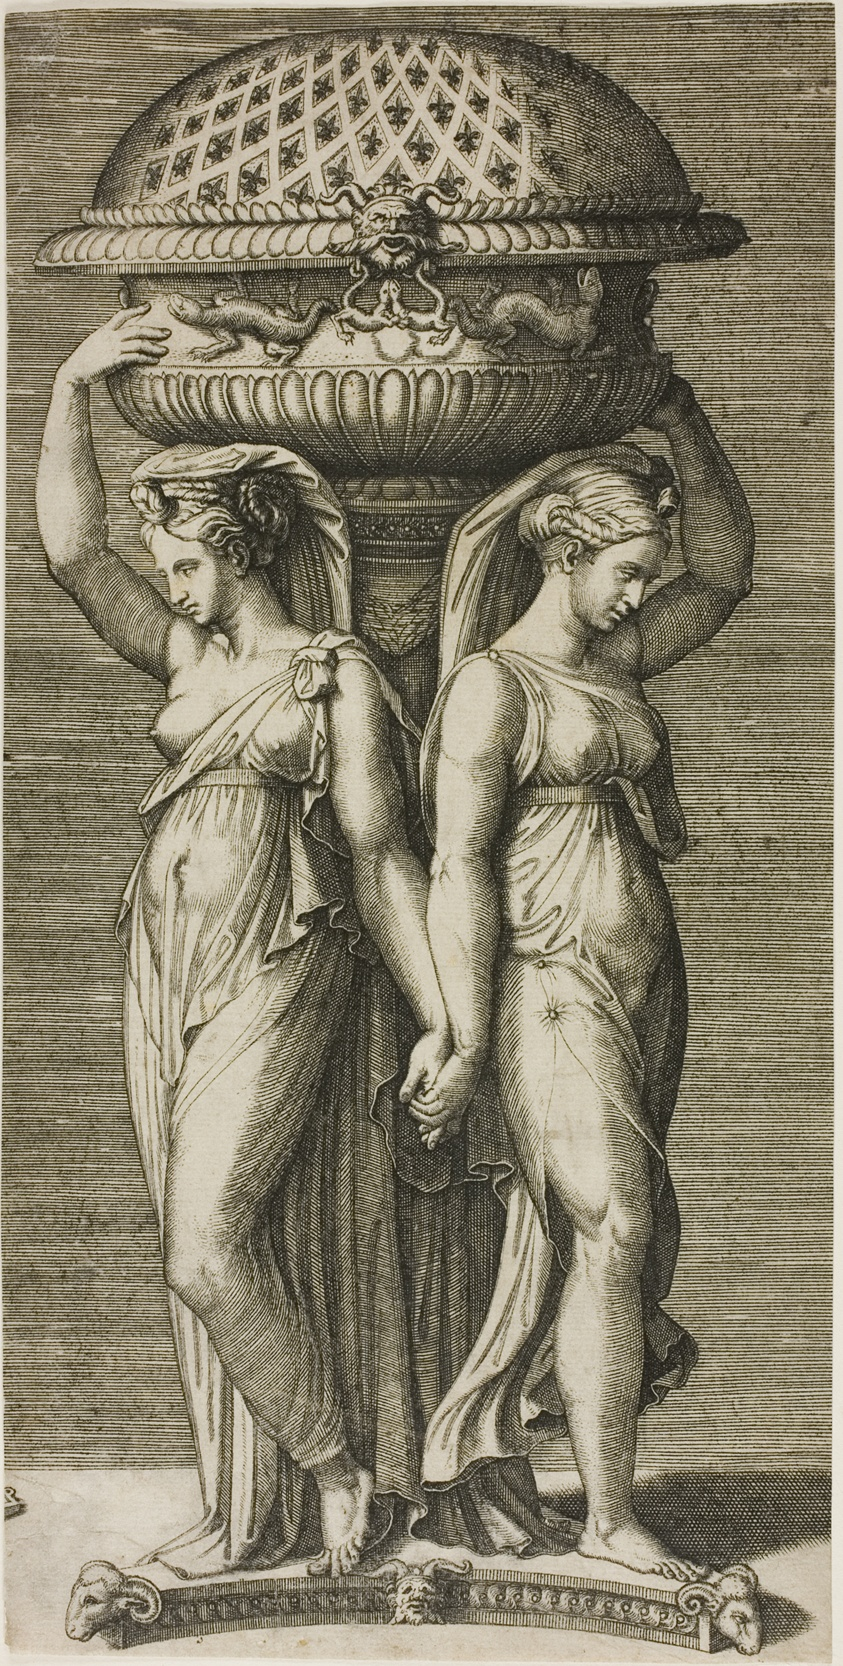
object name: Print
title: The Incense Burner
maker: Marcantonio Raimondi (Italian, c. 1480-1534); after Raphael (Raffaello Sanzio) (Italian, 1483-1520)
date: c. 1520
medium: Engraving in black on cream laid paper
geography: Italy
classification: engraving; print; prints and drawing